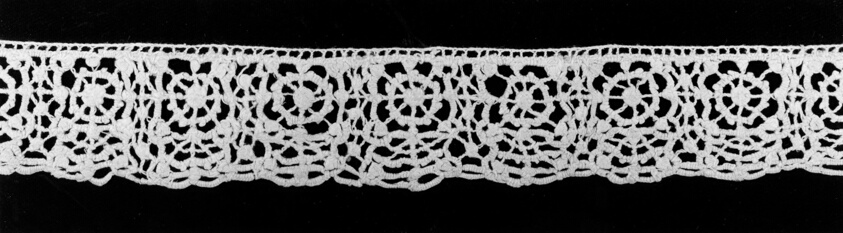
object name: Textile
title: Edging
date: Probably 1601/50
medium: Linen, needle lace on a laid thread grid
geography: Unknown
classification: textile; lace - needle